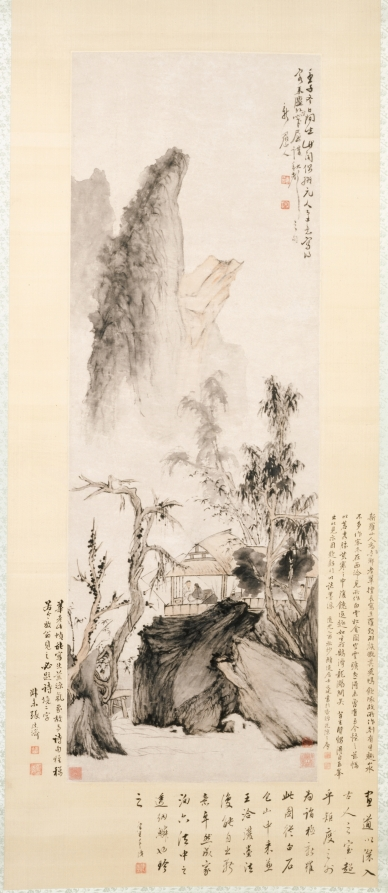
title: Conversation in Autumn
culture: China, Qing dynasty (1644-1911)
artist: Hua Yan (Chinese, 1682–c. 1765)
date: 1732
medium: Hanging scroll; ink and light color on paper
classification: Painting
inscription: Artist's inscription, signature, and 2 seals: On a winter day in the renzi year [1732], while leisurely sitting in my mountain pavilion, I happened to have imitated the brush style of Yuan masters on the two verses: "A guest came from the dusty world for a visit; in the small cottage we talked about the sound of autumn." Xin luo shan ren 新羅山人 [seals] Hua Yan 華喦; Qiuyue 秋岳.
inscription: 1 colophon and 2 seals of Zhang Tingji 張廷濟 (1768–1848): Old Hua [Yan], in this painting, was able to evoke the mood of desolation in nature and match the poetry elegantly. If Fangweng [Lu You 陸游 (1125–1210)] saw this, he would inscribe the painting with two words "idyllic world 詩境."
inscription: 新羅山人為吾鄉老輩，擅長寫生。羅致羽族，翫其飛鳴飲啄。故所作別有生趣。山水不多。作客冬在西泠，見所白雲松舎圖。空靈曠逸，得未曾有，至今憶之。兹幅以蒼秀勝，荒寒之中，復饒逸趣。如坐我鵠灣、龍瀃間矣。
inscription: 1 colophon and 1 seal of Zhu Angzhi 朱昂之 (1764–1841): The highest achievement in the art of painting is to penetrate deeply into the chamber of old masters, but at the same time transcend the bounds of conventional rules. This painting of Xinluo is derived from [the style of] Baishi (Shen Zhou 沈周, 1427–1509) and Baoshan (Lu Zhi 陸治, 1496–1576) with splashed-ink technique of Wang Qia 王洽 (Wang Mo 王默, ?–805), in addition to his own innovative ideas. Hence the distinctive style. Truly, he is one of those who passed through the net of the Six Canons [of Xie He 謝赫, 479–502]; treasure it.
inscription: 2 seals of Ye Tingguan 葉廷琯 (b. 1791); 1 seal unidentified.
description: Two figures sit conversing in a thatched cottage. This painting illustrates two poetic lines: My guest came to sit beyond the dust, In a narrow room, we talked about the autumnal sounds of autumn. Hua Yan presented an intimate world—simple and rustic—amid a landscape. The cool wilderness depicted in this work conveys an aloofness that may reveal the inner world of a scholar-artist who failed the civil service examination but preserved a sense of pride and endurance in his humble surroundings.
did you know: A barren tree on the lower left has a hole in its lower trunk through which is visible a young servant carrying food to the gentlemen in the cottage.